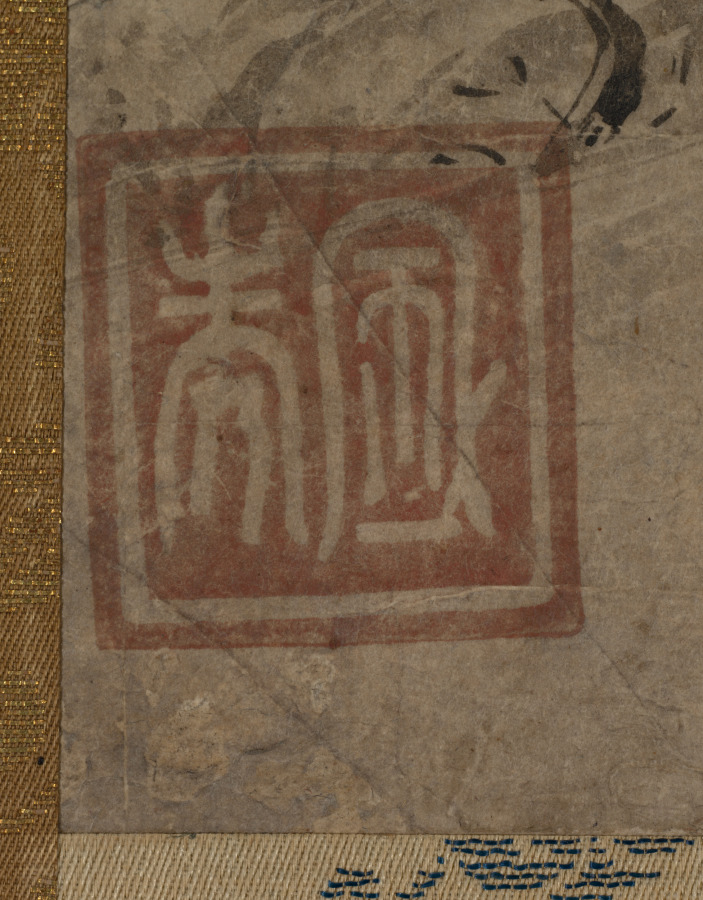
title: Landscape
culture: Japan, Muromachi period (1392–1573)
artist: Narihide (Japanese, active 1500s)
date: 1500s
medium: hanging scroll; ink on paper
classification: Painting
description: This composition includes imagery from the Eight Views of the Xiao and Xiang Rivers. Scanning the composition from top to bottom, at least six of the views are discernible: night rain over Xiao and Xiang, evening bell from a mist-shrouded temple, returning sails off a distant shore, geese descending to a sandbar, mountain village in clearing mist, and sunset glow over a fishing village. Inside the painting’s box is a document with a long inscription by prominent calligrapher, collector, and connoisseur Maeda Kōsetsu (1841–1916) discussing the painting’s subject and the matter of the painter’s biography—he appears to have been a Kano school artist, but his precise identity is unclear.